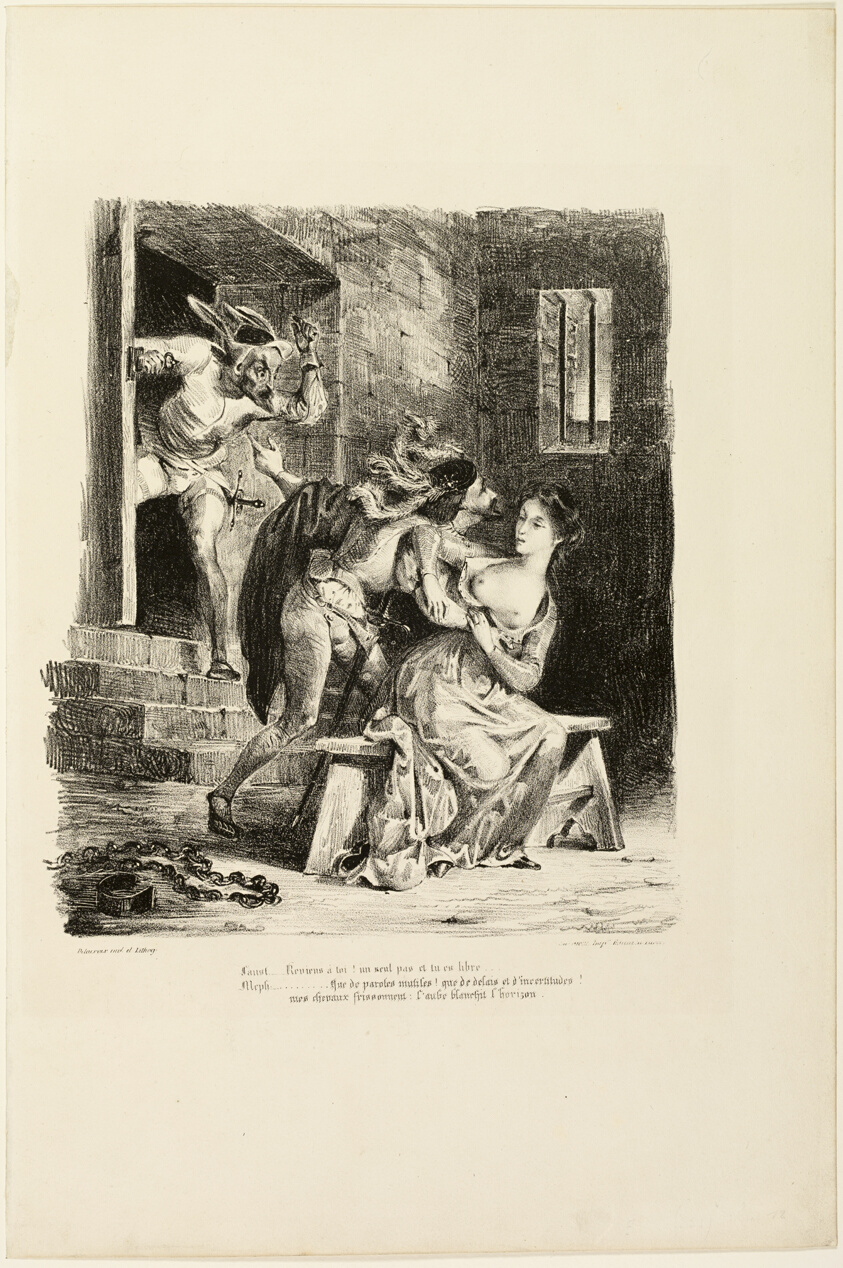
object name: Print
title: Faust in Marguerite's Prison Cell, from Faust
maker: Eugène Delacroix (French, 1798-1863)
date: 1828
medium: Lithograph in black on ivory wove paper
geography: France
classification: lithograph; print; prints and drawing